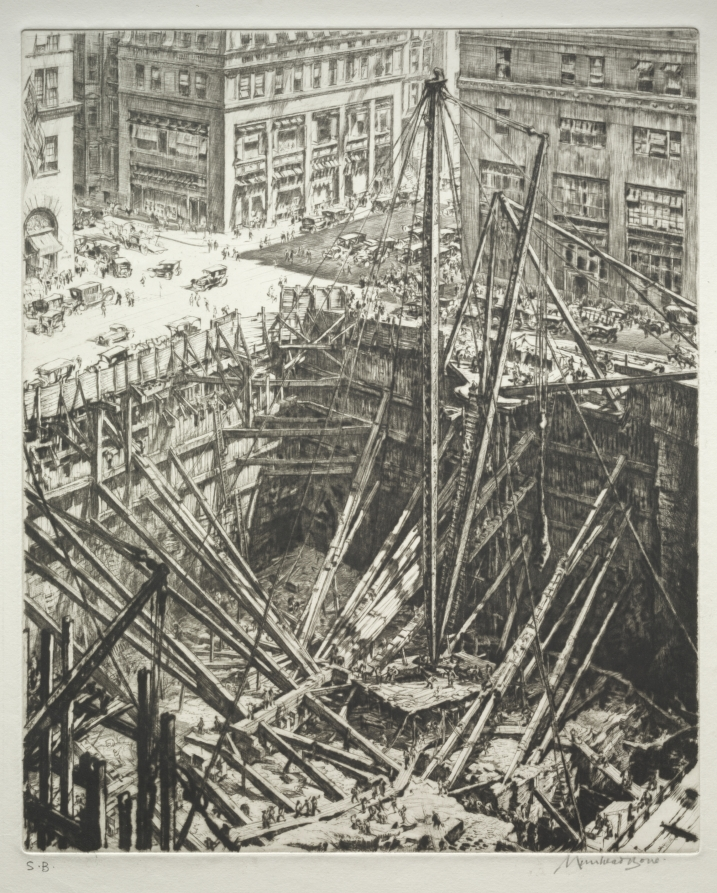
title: Manhattan Excavation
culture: England, 20th century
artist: Muirhead Bone (British, 1876–1953)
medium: drypoint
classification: Print